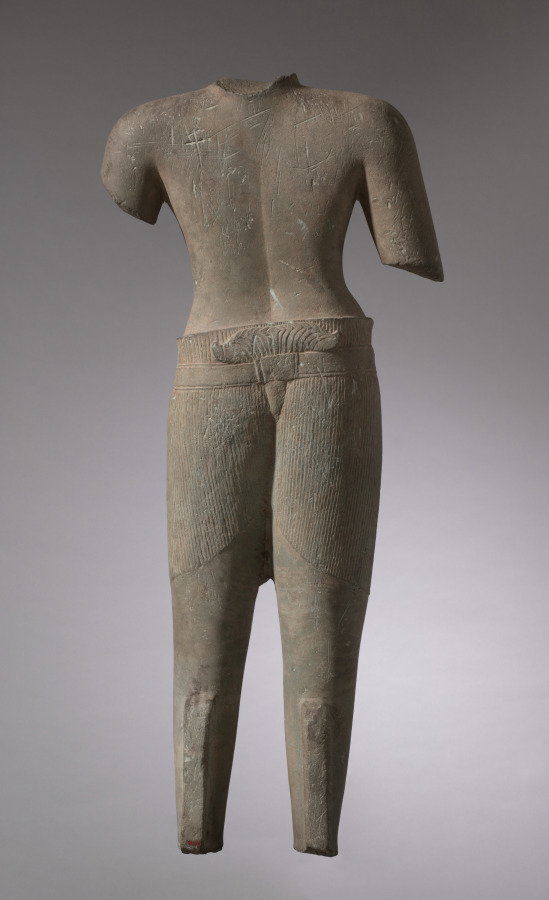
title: Male Deity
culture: Cambodia, Koh Ker-Khleong style, 10th century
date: 925–50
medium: sandstone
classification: Sculpture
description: The distinctive swath of pleated cloth and the anchor-shaped ends of the lower garment suggest that this sculpture was made when this method of wrapping the sampot was fashionable. During that time, Cambodian temples were dedicated to Hindu deities, whose images were dramatically installed alone on a pedestal in a temple's sanctum. When consecrated, gold tokens were installed under the pedestal; many sculptures were broken when people toppled them to get the gold.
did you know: This male deity seems to be striding with his left leg advanced subtly forward.